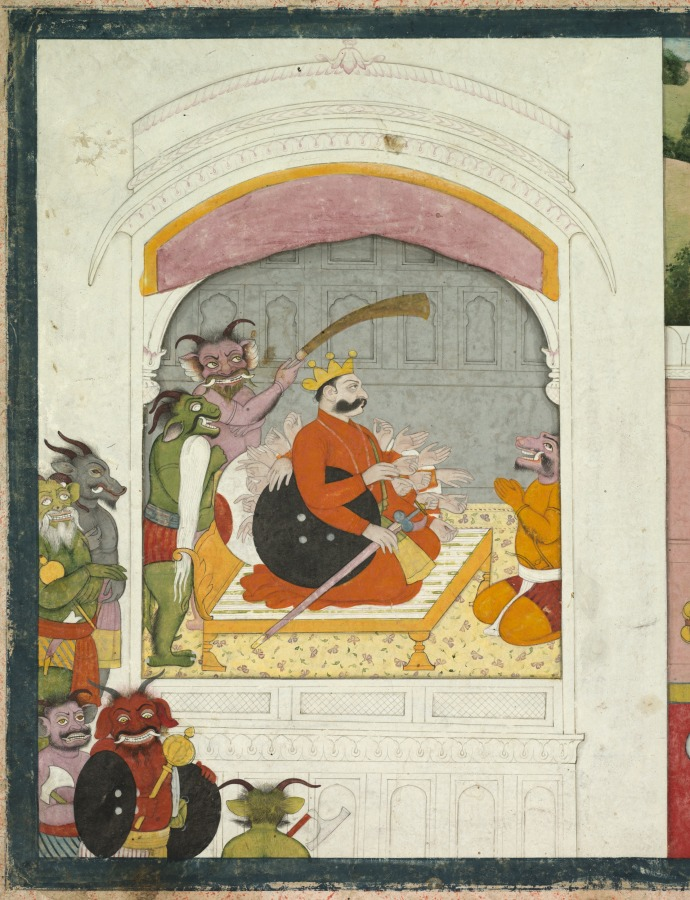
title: King Bana in his court, from an Usha-Aniruddha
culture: Northern India, Pahari kingdoms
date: c. 1760–70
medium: Gum tempera and ink on paper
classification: Painting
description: This portrait of a demon king depicts him listening to the report of one of his ministers. He may be hearing the news that his daughter Usha has been secretly receiving Krishna’s grandson Aniruddha in her bedchamber. The artist has depicted Bana with his 20 arms emerging like tentacles from his body. The members of his multicolored demon court are imaginatively rendered combinations of beasts and humans. In the background, demons harass holy men by burning their huts and chasing them away from their settlements.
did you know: Clara Taplin Rankin, the donor of this painting, was a trustee of the CMA as well as the Musical Arts Association and the Cleveland Institute of Music.